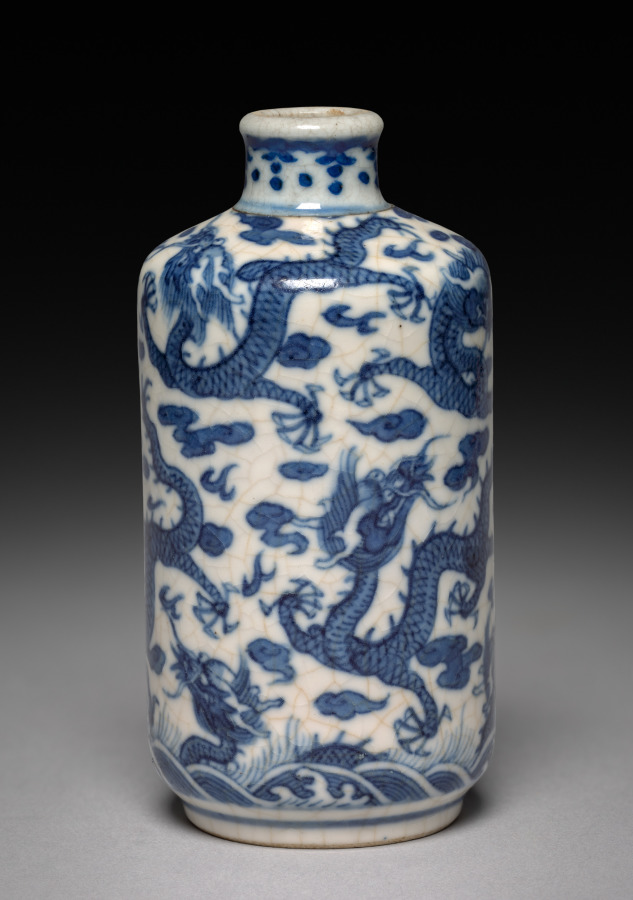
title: Snuff Bottle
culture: China, Qing dynasty (1644-1911), Kangxi reign (1662-1722)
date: 1662–1722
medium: porcelain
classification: Ceramic